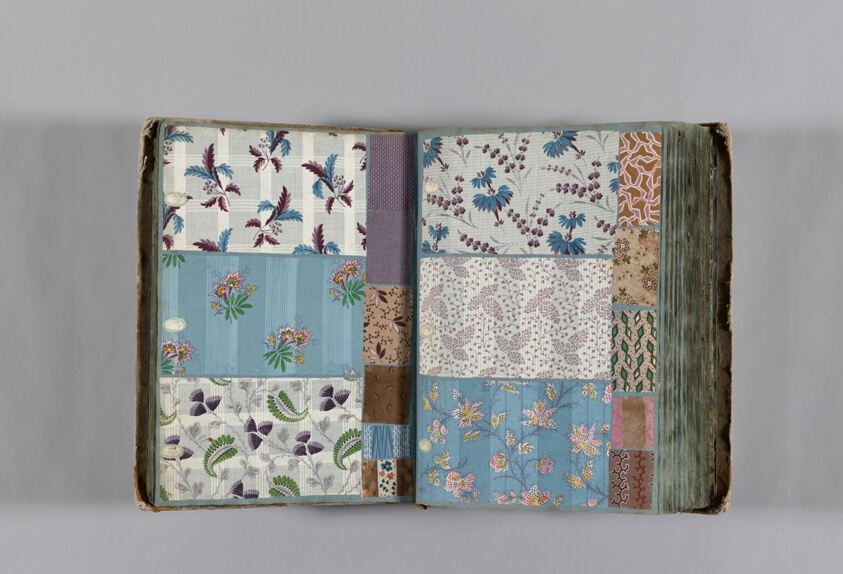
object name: Book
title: Sample book of swatches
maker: Mulhouse, France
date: 19th c.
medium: Sample book of swatches: cotton, plain weave, block printed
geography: France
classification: book; printed; weaving - printed